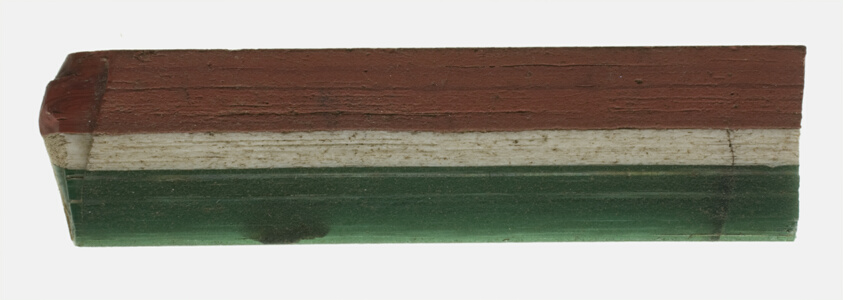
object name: Decorative Arts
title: Fragment of an Inlay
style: roman period (egyptian), greco-roman (egyptian)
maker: Egyptian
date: 3rd century BCE/1st century CE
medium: Glass, mosaic technique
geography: Egypt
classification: glass; inlay; ancient art; decorative arts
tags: decoration